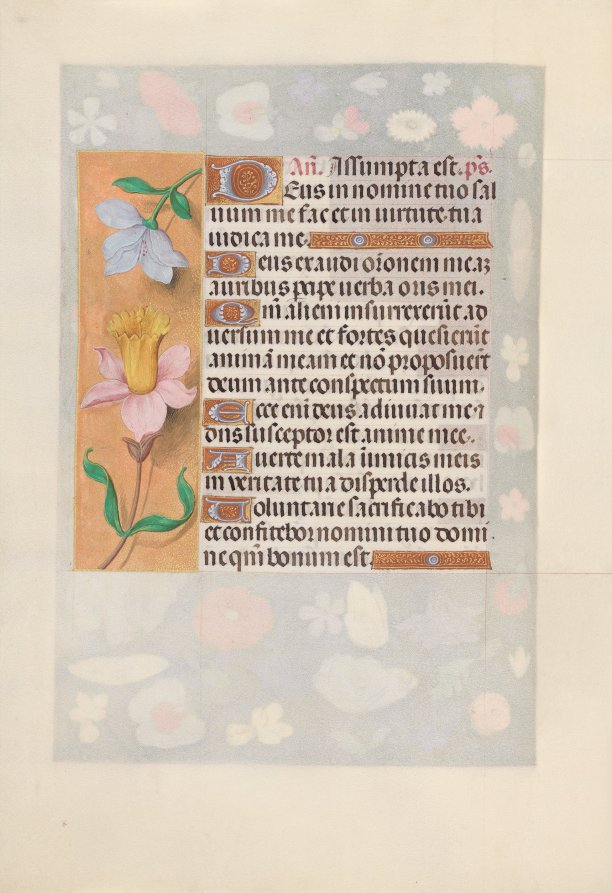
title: Hours of Queen Isabella the Catholic, Queen of Spain: Fol. 127v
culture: Flanders, Ghent and Bruges, late 15th century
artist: Master of the First Prayerbook of Maximillian (Flemish, c. 1444–1519)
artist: and Associates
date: c. 1500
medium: ink, tempera, and gold on vellum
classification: Bound Volume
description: This manuscript was illuminated by a circle of at least five highly organized manuscript painters active in the Flemish cities of Ghent and Bruges. The principal illuminator was Alexander Bening, who painted the majority of the book's miniatures. Manuscripts produced by this circle of artists are renowned for the decoration of their borders, which typically feature a rich variety of realistically-painted flowers, birds, and butterflies. This prayer book, called a book of hours, was intended not for a cleric, but for the private devotions of a lay person-in this case, Isabella the Catholic, Queen of Spain (1451-1504). Isabella's coat of arms embellishes the book's frontispiece. It is unlikely that the book was commissioned by the Queen herself; rather, she probably received it as a diplomatic gift from someone courting her patronage, perhaps Cardinal Francisco Jimenez de Cisneros. A Franciscan friar, Jimenez was dependent upon Isabella for his advancement, first to the post of Queen's confessor in 1492, and then to Archbishop of Toledo in 1495.